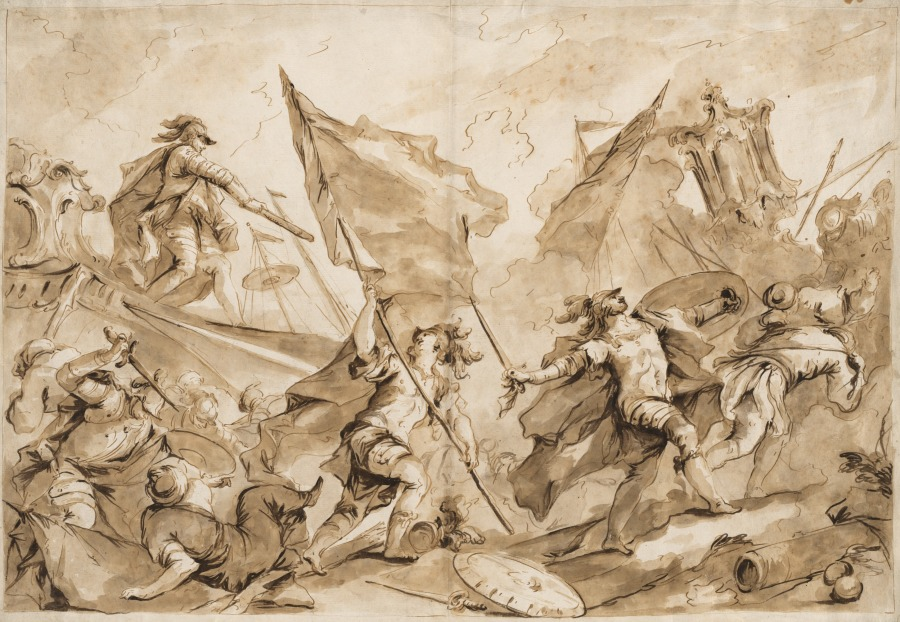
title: Jacopo Marcello Directing the Assault of Gallipoli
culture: Italy, 18th century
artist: Antonio Guardi (Italian, 1699–1760)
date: 1750–60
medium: pen and brown ink and brush and brown wash, over black chalk; framing lines in brown ink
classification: Drawing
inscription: On verso, upper right, in brown ink: "4"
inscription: verso, lower right, in brown ink: "3"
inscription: verso, upper left, typewritten on separately applied piece of paper: "12795 / tlf DRL"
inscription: verso, lower right, in graphite: "75 x 51 1/2"